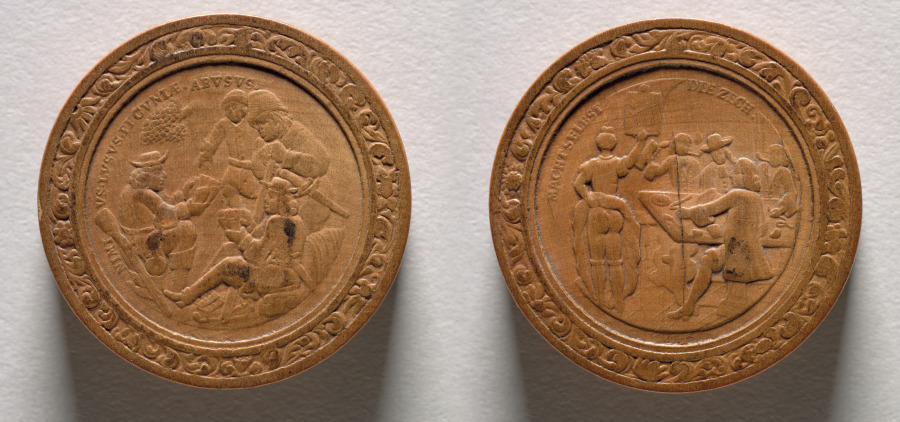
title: Gaming Piece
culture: Germany, late 17th-early 18th Century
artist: Martin Brunner (German, 1659–1725)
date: c.1700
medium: wood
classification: Furniture and woodwork